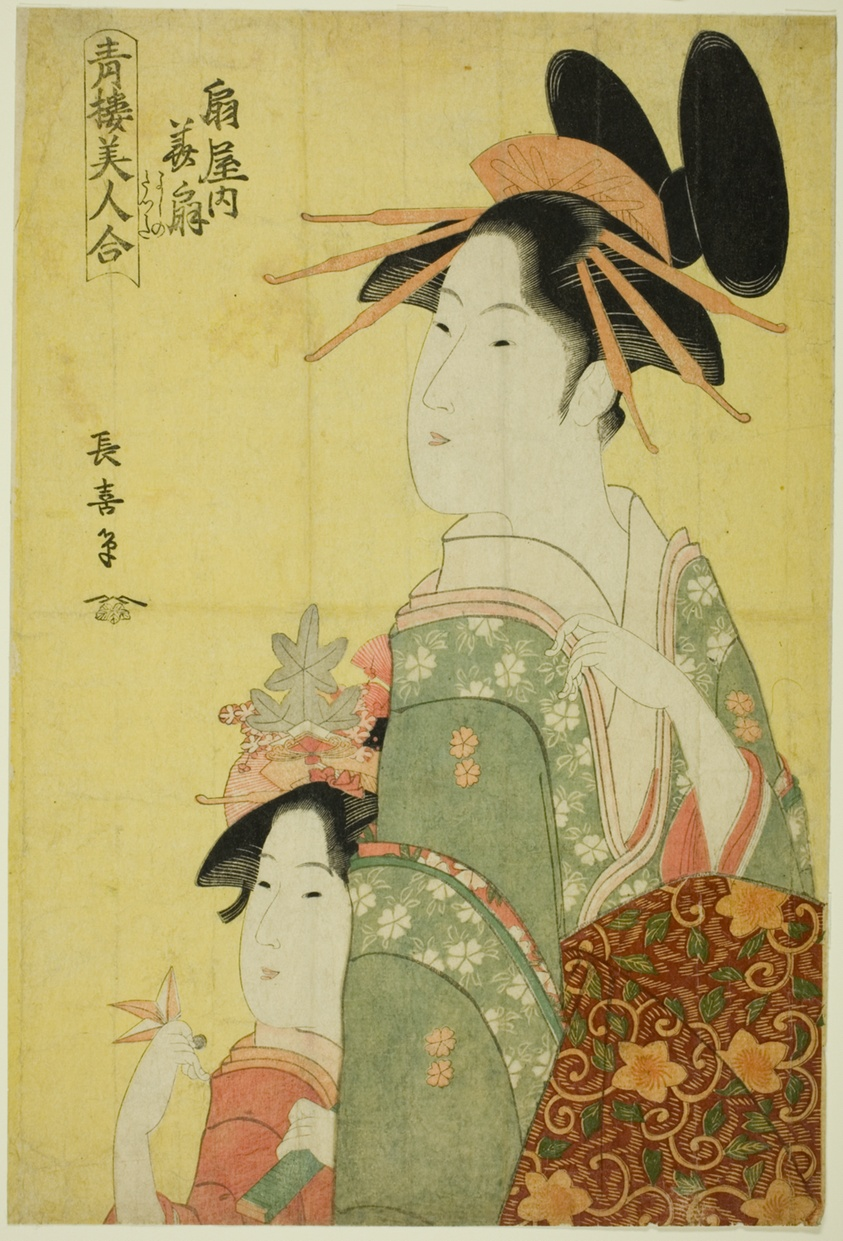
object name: Print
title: Hanaogi of the Ogiya, from the series "Beauties of the Pleasure Quarters (Seiro bijin awase)"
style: Japanese (culture or style)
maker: Eishosai Choki (Japanese, active c. 1790s-early 1800s)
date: c. 1793/97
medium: Color woodblock print; oban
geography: Japan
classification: woodblock print; print; asian art